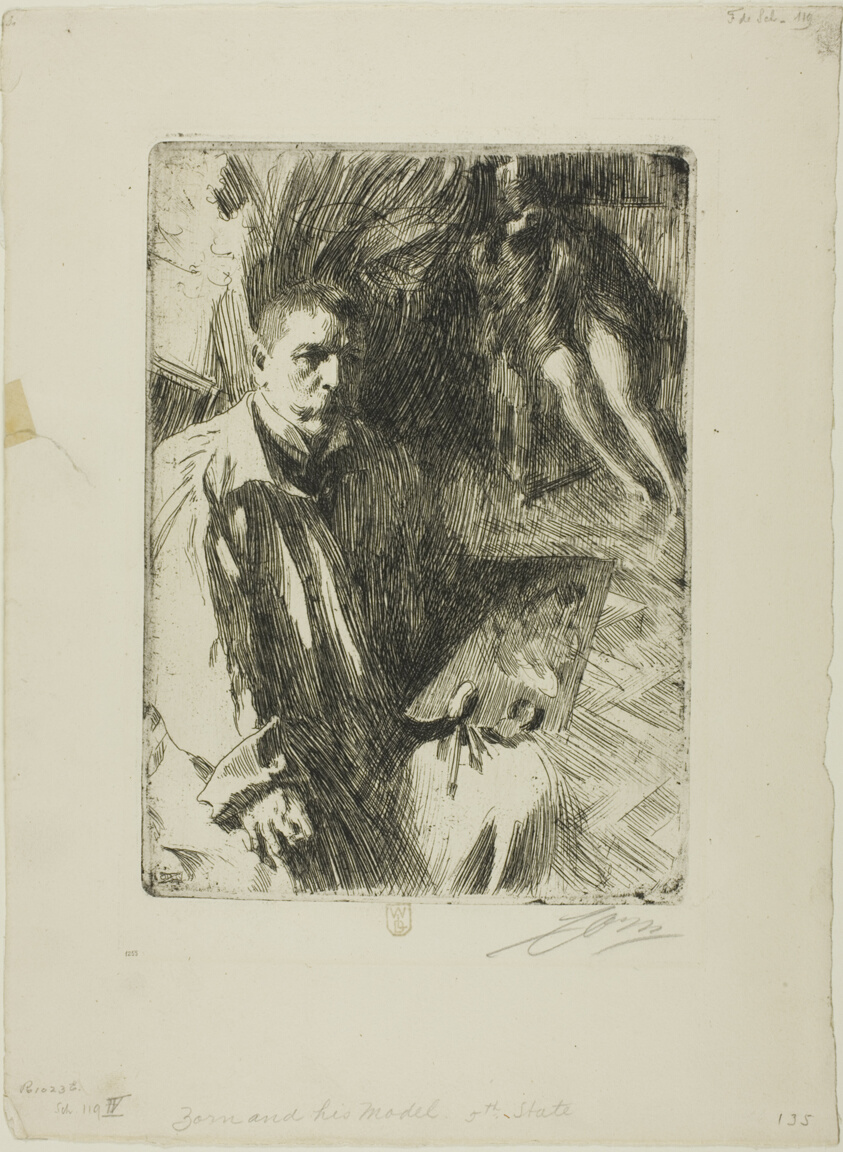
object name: Print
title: Self-Portrait with Model II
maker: Anders Zorn (Swedish, 1860-1920)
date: 1899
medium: Etching on ivory wove paper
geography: Sweden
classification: etching; print; prints and drawing